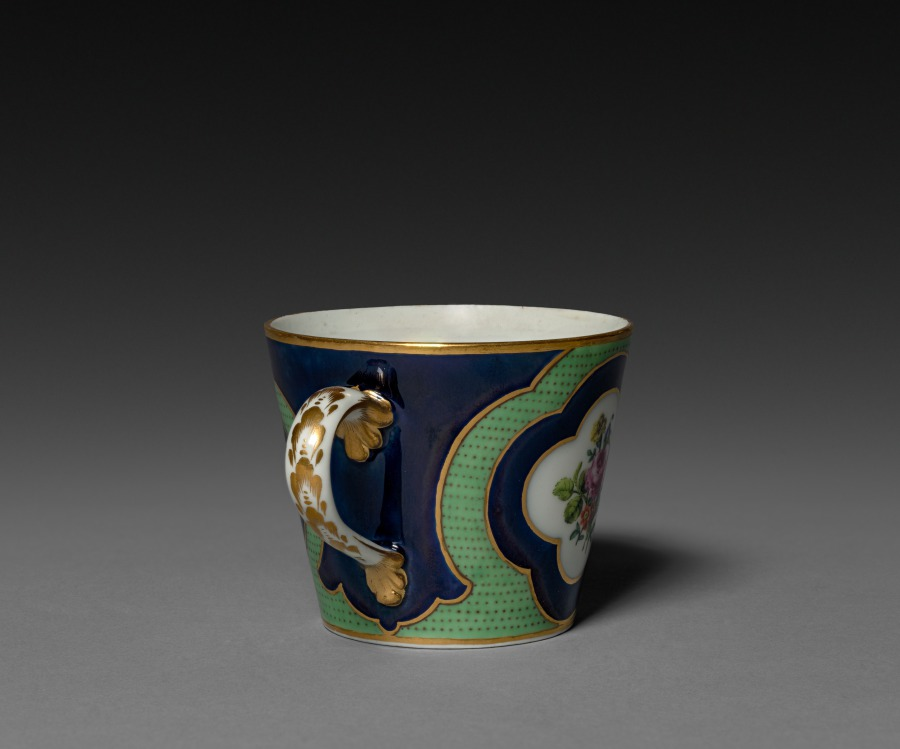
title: Two-Handled Cup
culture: Austria, Vienna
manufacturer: Du Paquier Porcelain Manufactory (Austrian, active 1719–1864)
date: c. 1780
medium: porcelain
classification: Ceramic